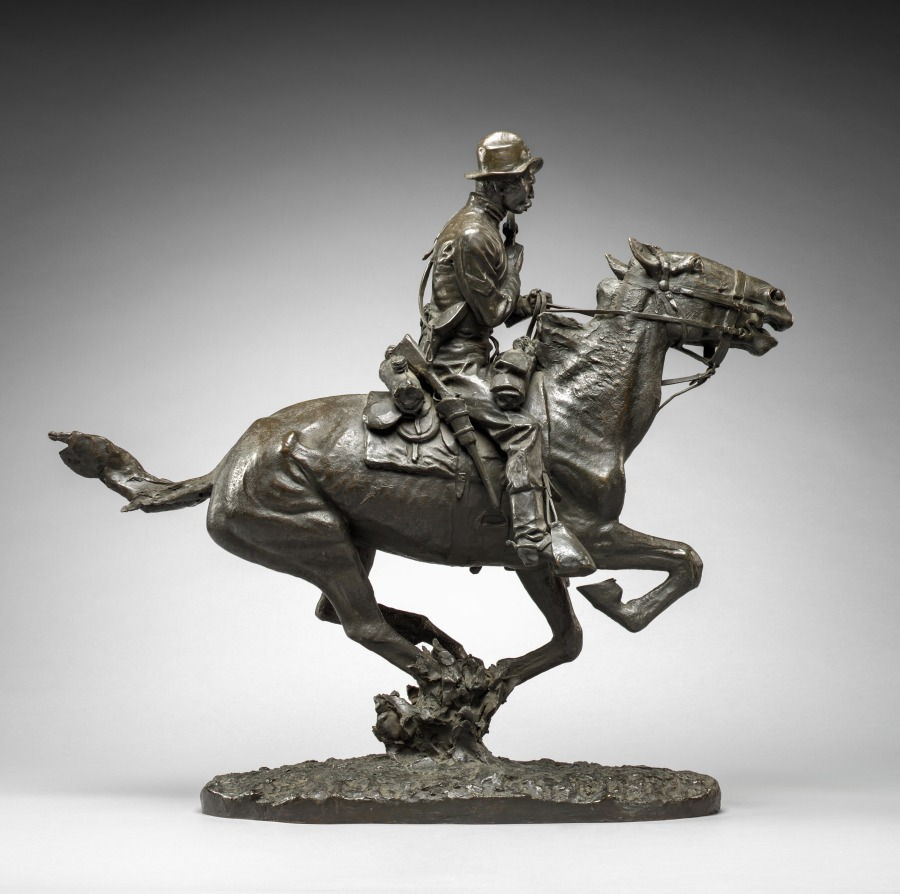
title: Trooper of the Plains-1868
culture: America, early 20th Century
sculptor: Frederic Remington (American, 1861–1909)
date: modeled 1908, cast c. 1911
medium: bronze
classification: Sculpture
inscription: Signed on top of base: Frederic Remington; Inscribed on side of base: Copyright by Frederick Remington, Roman Bronze Works, N.Y.; numbered underneath base: 3